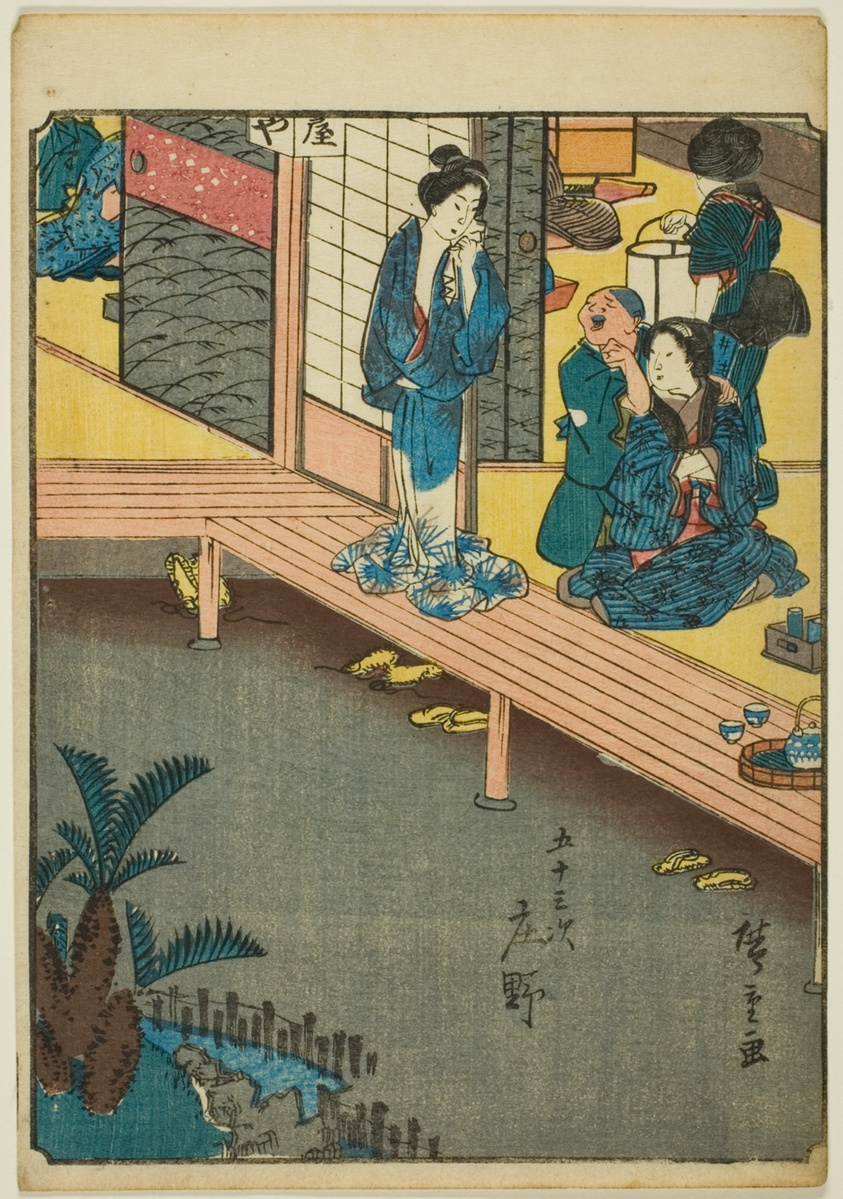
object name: Print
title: Shono, from the series "Fifty-three Stations [of the Tokaido] (Gojusan tsugi)," also known as the Figure Tokaido (Jinbutsu Tokaido)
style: Japanese (culture or style)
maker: Utagawa Hiroshige 歌川 広重; Japanese, 1797-1858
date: 1852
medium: Color woodblock print; chuban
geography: Japan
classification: woodblock print; print